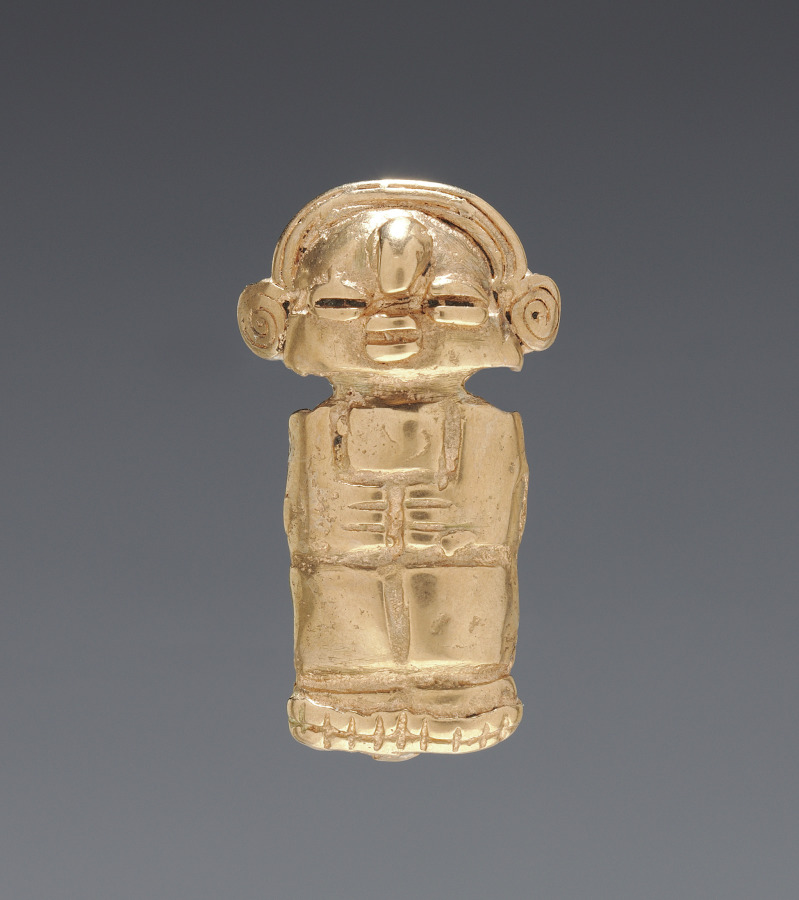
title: Necklace Figurine Bead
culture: Colombia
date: 1–700 CE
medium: cast gold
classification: Jewelry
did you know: Working with gold dates back to at least 500 BC in Ecuador and Colombia.